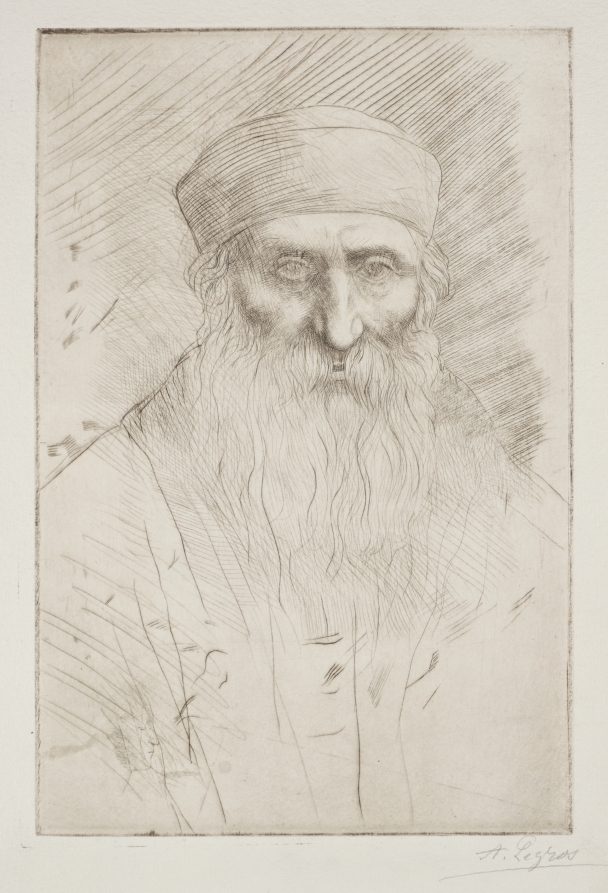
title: Head of a Man with a Long Beard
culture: France, 19th century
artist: Alphonse Legros (French, 1837–1911)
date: c. 1857–1911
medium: drypoint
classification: Print